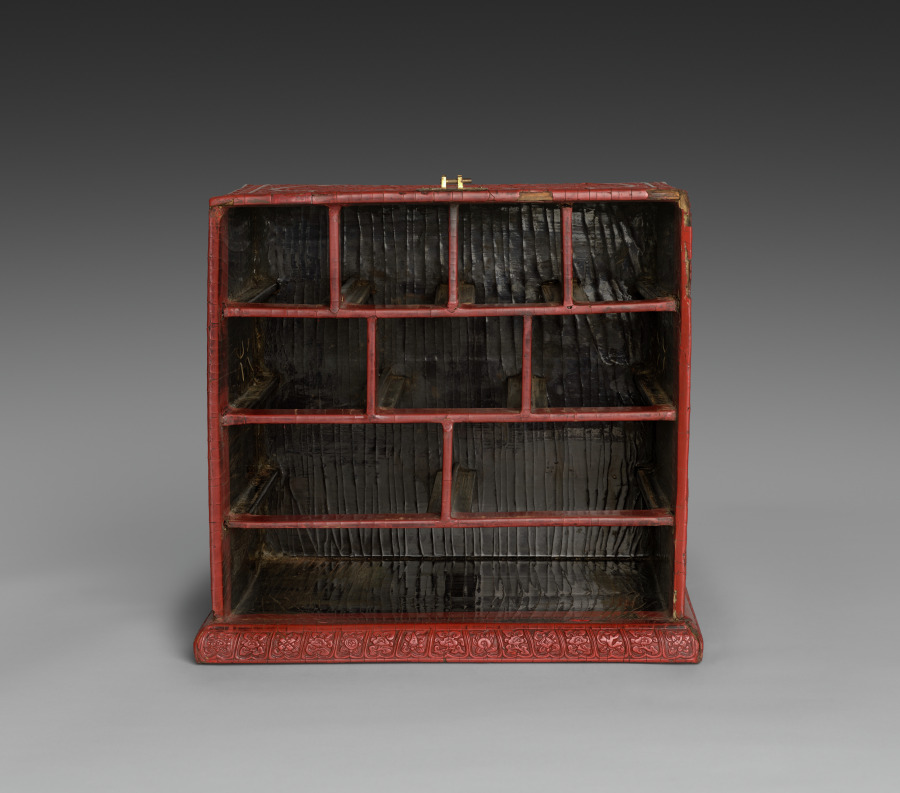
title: Tihong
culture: China, Ming dynasty (1368-1644), Wanli reign (1572-1620)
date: 1585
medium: carved cinnabar lacquer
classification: Lacquer